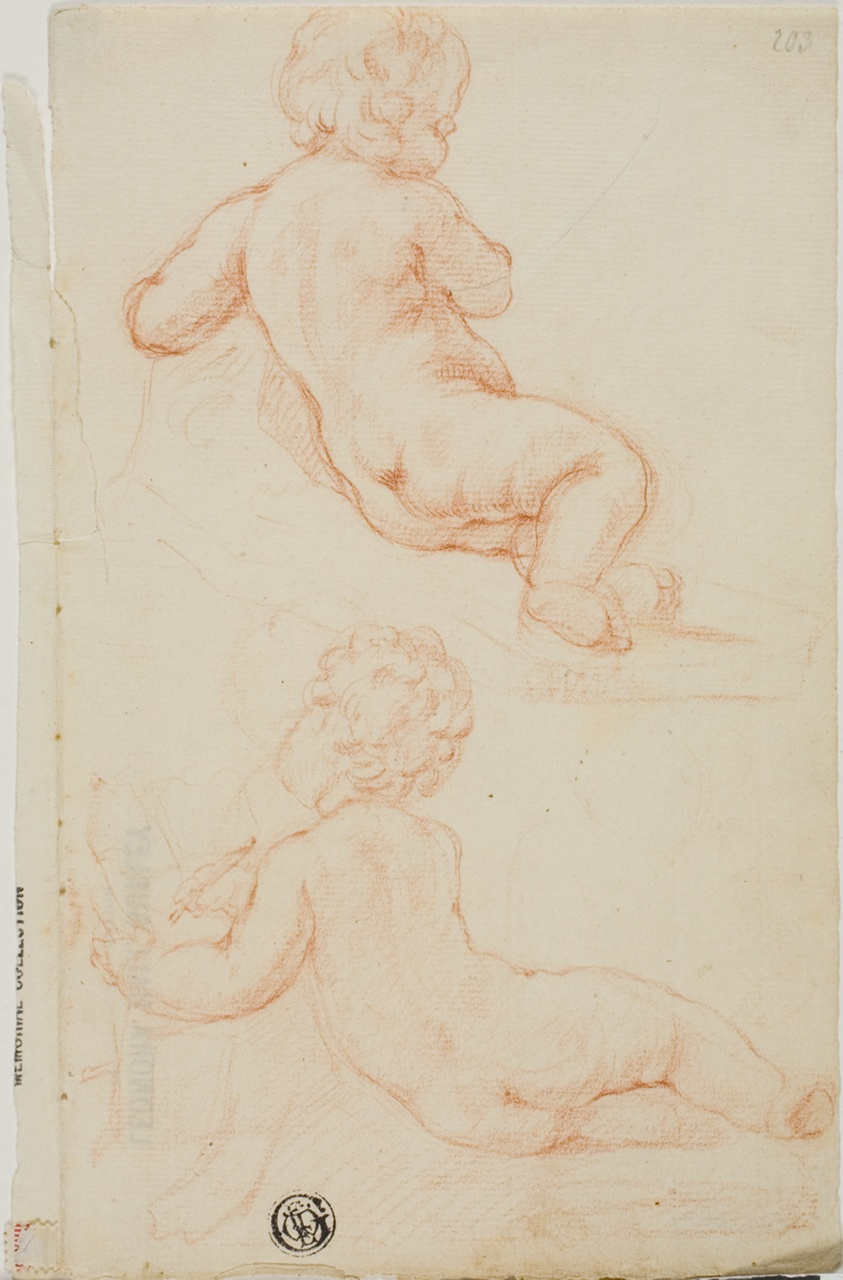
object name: Drawing and Watercolor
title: Two Putti Seen from the Back, One Writing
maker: Unknown Artist; French, 18th century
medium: Red chalk on cream laid paper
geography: France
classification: chalk; drawings (visual works); prints and drawing